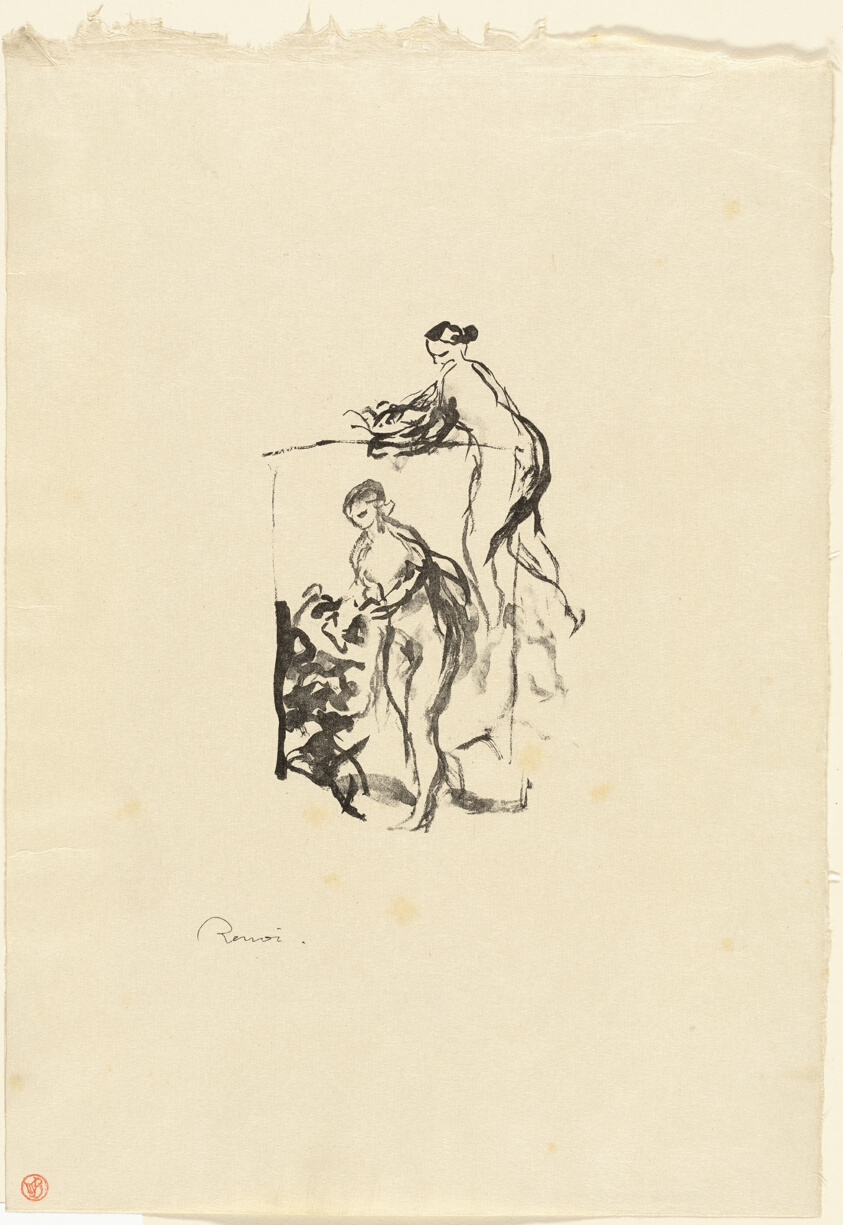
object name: Print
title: Woman with Grapevine, 3rd variant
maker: Pierre Auguste Renoir (French, 1841-1919); printed by Auguste Clot (French, 1858-1936); published by Ambroise Vollard (French, 1835-1939)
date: c. 1904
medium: Lithograph in black on cream Japanese paper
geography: France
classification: lithograph; print; prints and drawing